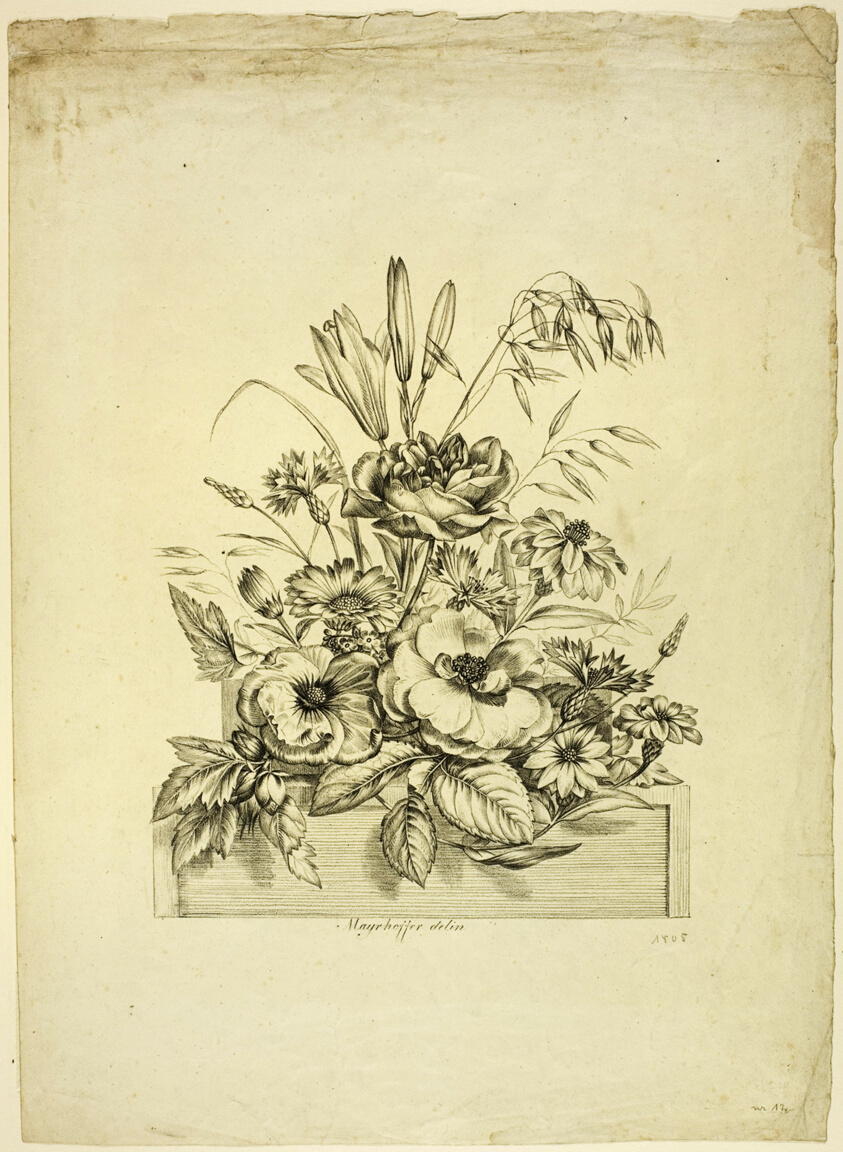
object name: Print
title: Flower Piece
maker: Johann Nepomuk Mayrhoffer (German, born Austria, 1764-1832)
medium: Engraving in black on paper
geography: Germany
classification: lithograph; print; prints and drawing